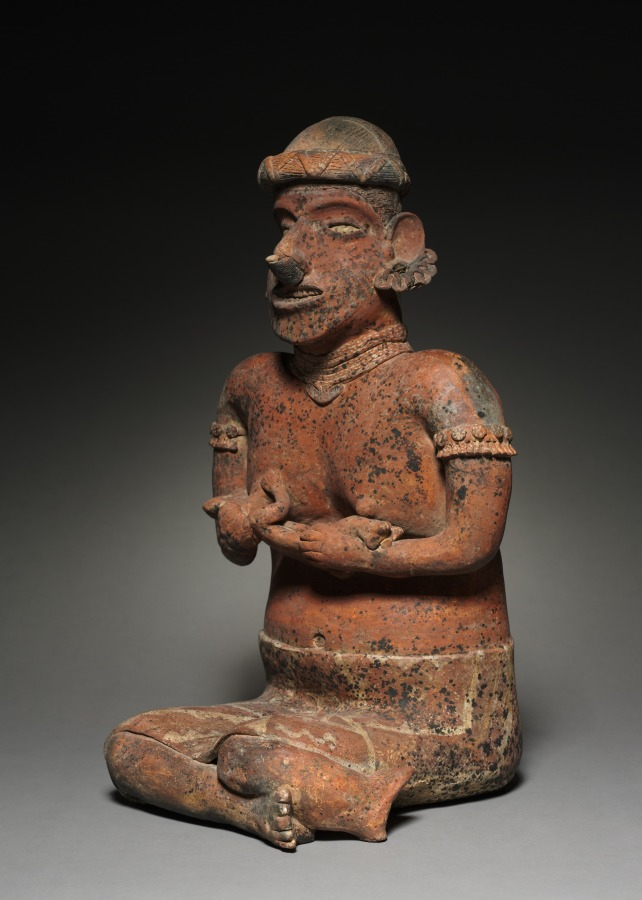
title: Female Seated Figure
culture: Mexico, Nayarit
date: 100 BCE–300 CE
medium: ceramic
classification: Ceramic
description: This couple-extremely fine examples of their kind-may commemorate the marriage of an important person, such as a chief, but could also represent siblings of a chiefly family. Whatever their relationship, their unity is conveyed by their physical similarities, including their jewelry, which marks high social station. The female is unusual in nursing an infant, likely a reference to generational renewal and the continuation of noble bloodlines. The significance of the male’s activity-beating a turtle-shell drum- is not understood.